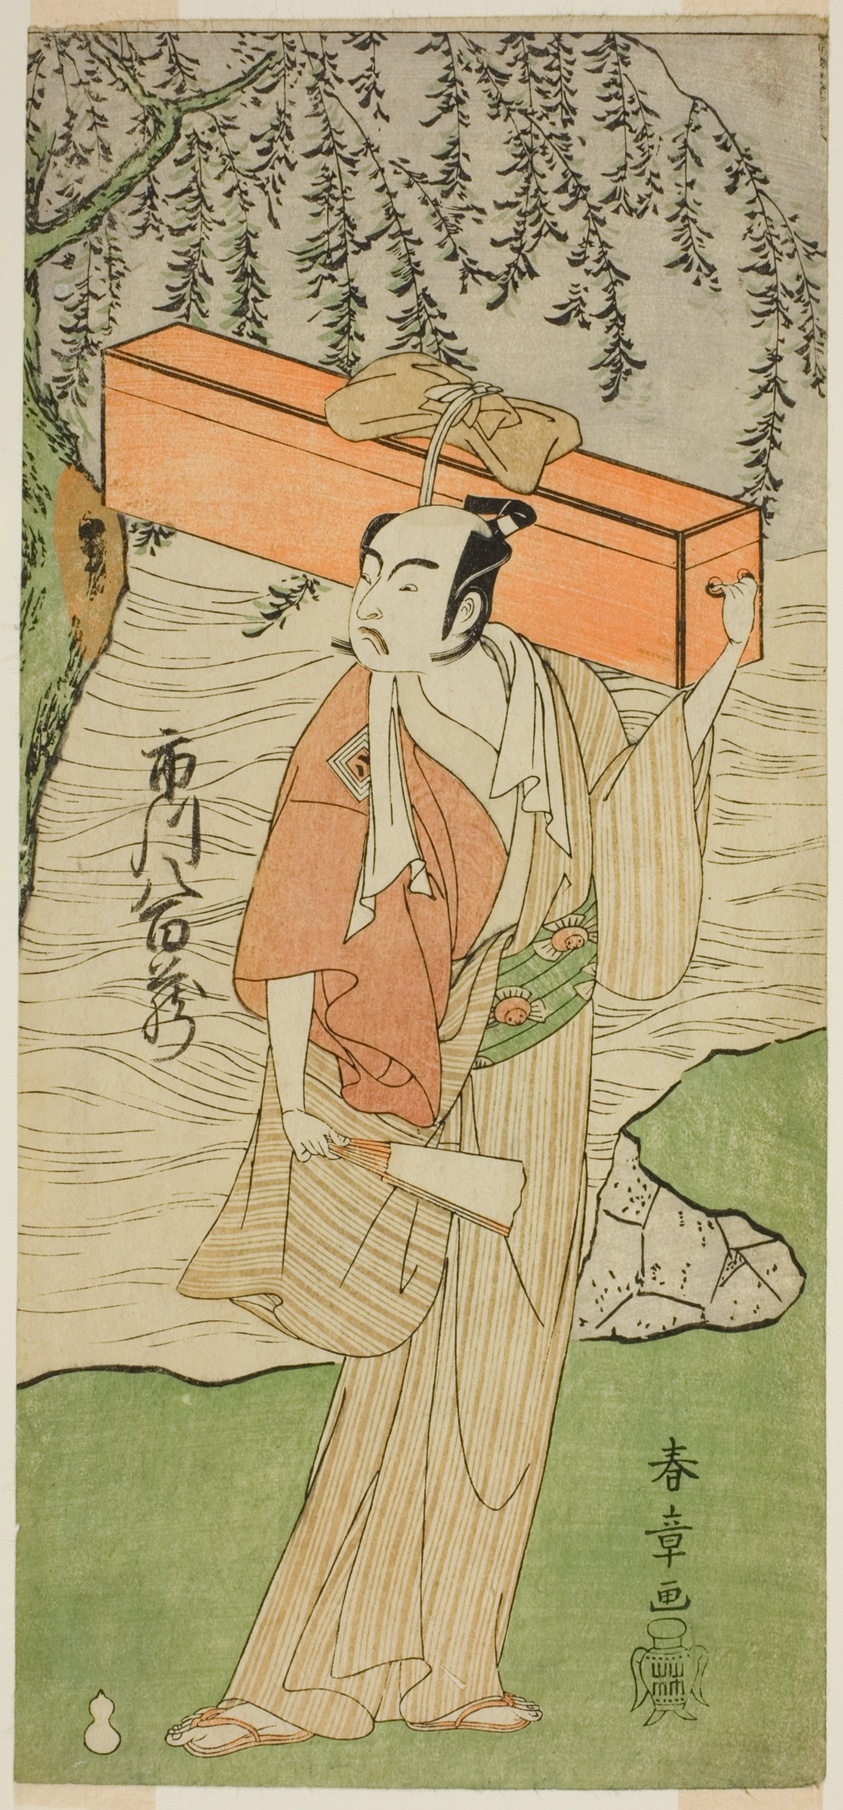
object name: Print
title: The Actor Ichikawa Yaozo II as Soga no Juro Sukenari Disguised as the Proefessional Jester Senraku (?) in the Play Soga Moyo Aigo no Wakamatsu (?), Performed at the Nakamura Theater (?) in the Second Month, 1769 (?)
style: Japanese (culture or style)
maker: Katsukawa Shunsho 勝川 春章; Japanese, 1726-1792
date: c. 1769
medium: Color woodblock print; hosoban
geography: Japan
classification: woodblock print; print; asian art